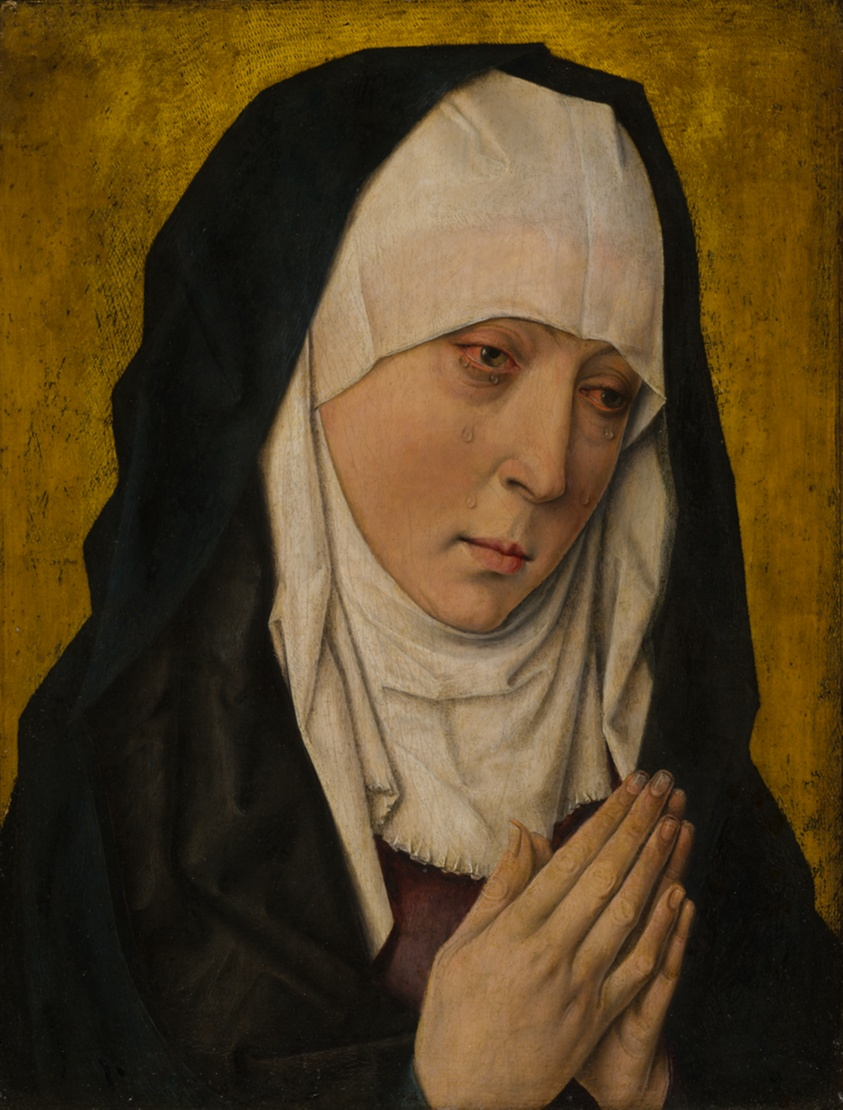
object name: Painting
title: Mater Dolorosa (Sorrowing Virgin)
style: 15th century, northern renaissance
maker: Workshop of Dieric Bouts (Netherlandish, 1415–1475)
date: c. 1490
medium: Oil on panel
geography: Netherlands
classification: oil on panel; oil paintings (visual works); paint; painting; european painting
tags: Virgin Mary, woman, sadness, religious, religion, Christianity, Christian subjects